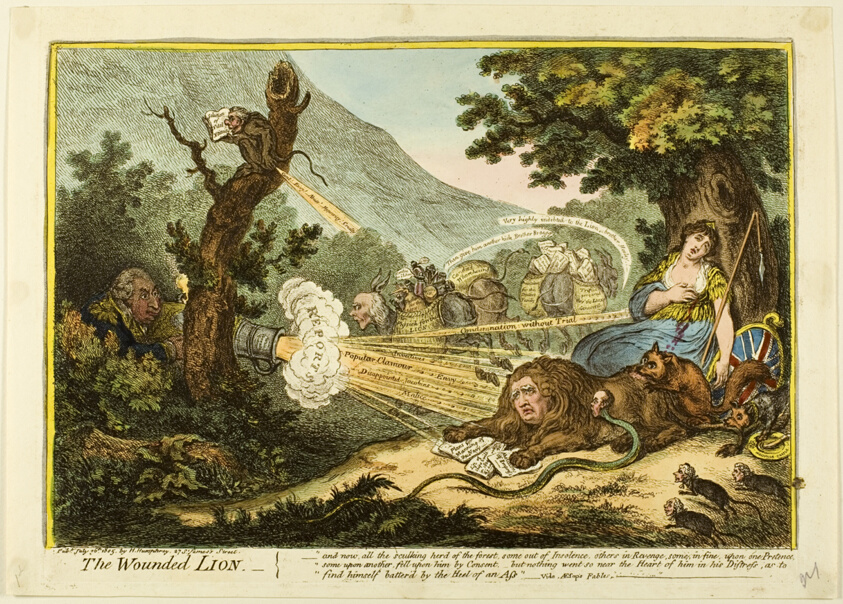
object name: Print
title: The Wounded Lion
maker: James Gillray (English, 1756-1815); published by Hannah Humphrey (English, c. 1745-1818)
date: published July 16, 1805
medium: Hand-colored etching on paper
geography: England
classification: etching; print; prints and drawing